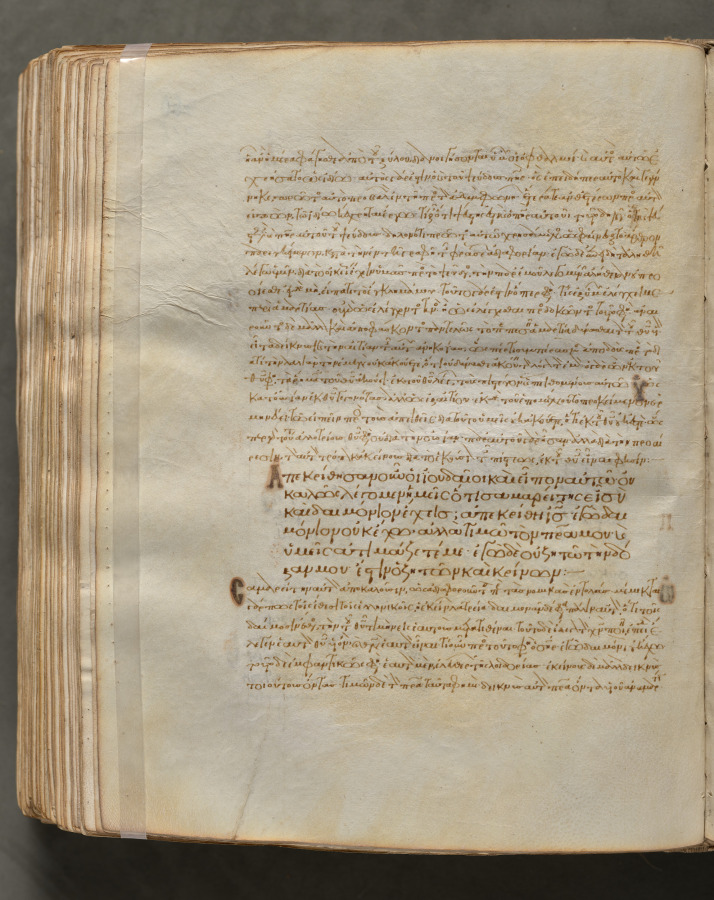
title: Text, folio 366 (verso), from a Gospel Book with Commentaries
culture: Byzantium, Constantinople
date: c. 1000–1100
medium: ink, tempera, and gold on vellum; leather binding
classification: Bound Volume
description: Each of the four gospels in this book opens on a page with brilliantly illuminated borders depicting the author of the text as well as birds—principally peacocks, symbols of the immortality of the soul—and fountains, representing the fountain of life and the salvation of the soul. This volume consists of 428 leaves with texts in Greek. Its level of sophistication suggests that it was probably written and decorated in a monastery in Constantinople.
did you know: Gospel books were carried in procession through Byzantine churches.